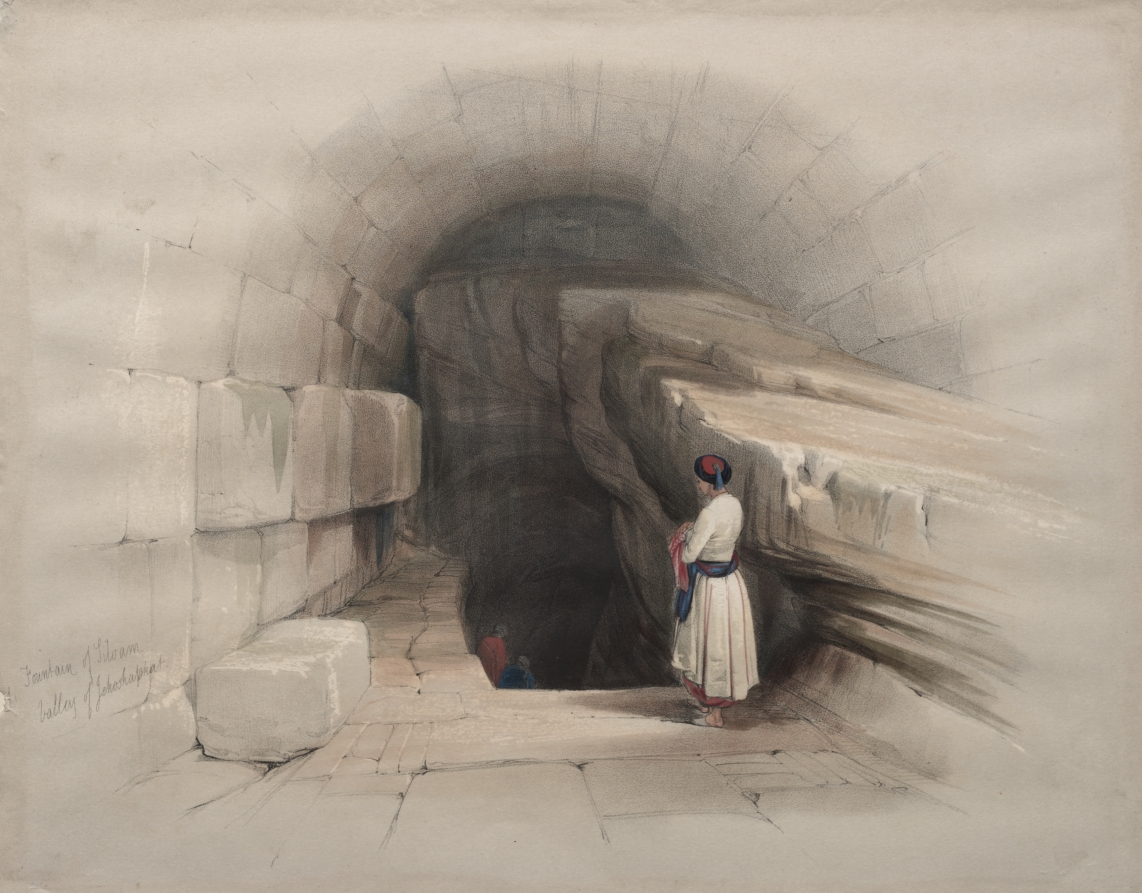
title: Fountain of Siloam, Valley of Jehoshaphat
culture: England, 19th century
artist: David Roberts (Scottish, 1796–1864)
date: 1839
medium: color lithograph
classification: Print